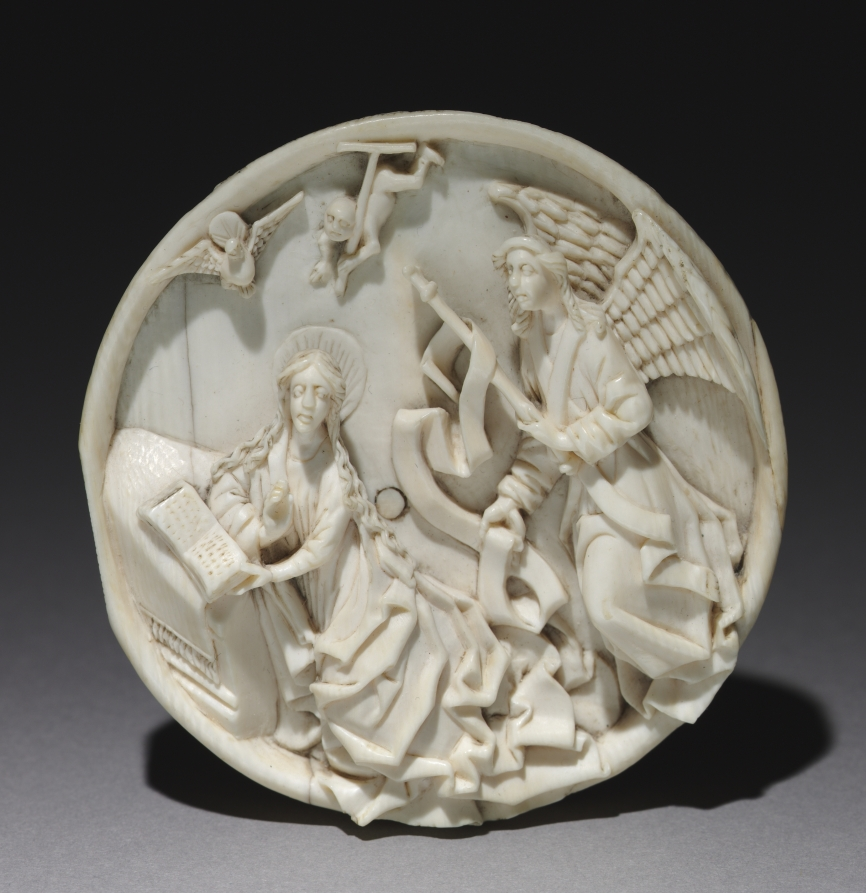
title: Roundel with the Annunciation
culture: Germany, Upper Rhine, 15th century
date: c. 1470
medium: ivory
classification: Ivory